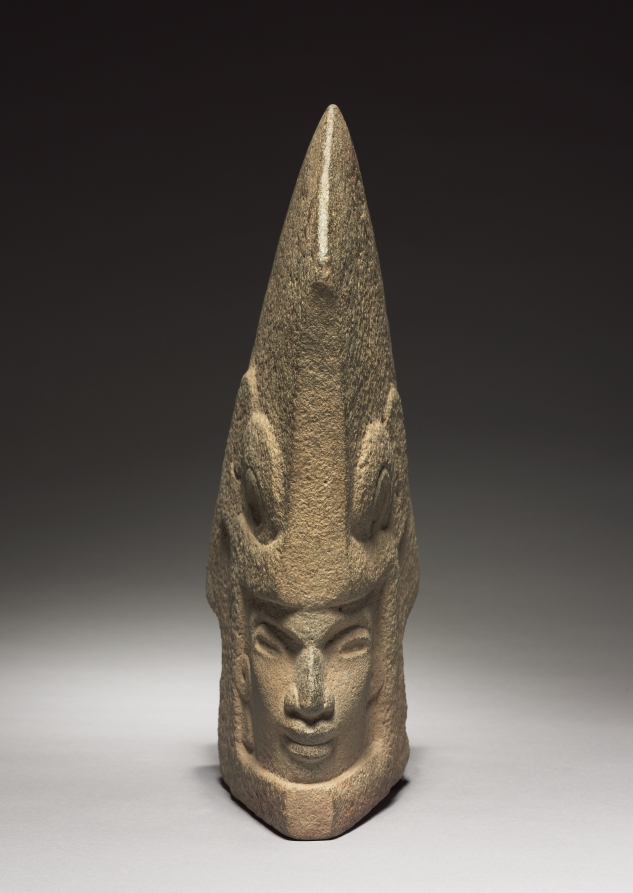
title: Hacha with Human Face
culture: Mexico, Veracruz, San Andres Tuxtla, late Classic period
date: 600–1000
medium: gray volcanic stone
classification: Sculpture